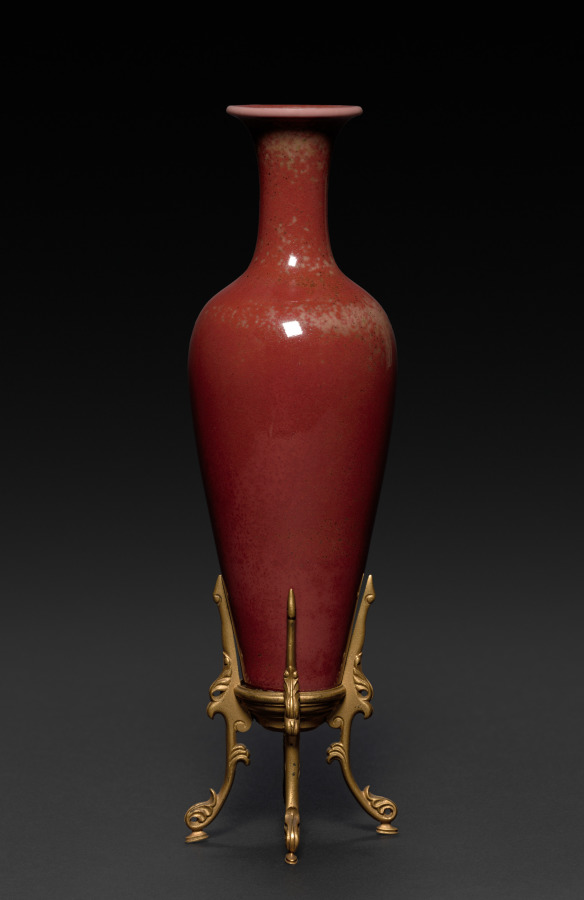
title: Bottle with Peach Bloom Glaze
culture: China, Qing dynasty (1644-1911), Kangxi reign (1661-1722)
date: 1662–1722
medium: porcelain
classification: Ceramic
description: The "peach-bloom" glaze developed during the Kangxi era has also been described as "drunken with beauty." Technical achievements were transcended with aesthetic associations, revealing the greatest sensitivity to all things beautiful in nature.